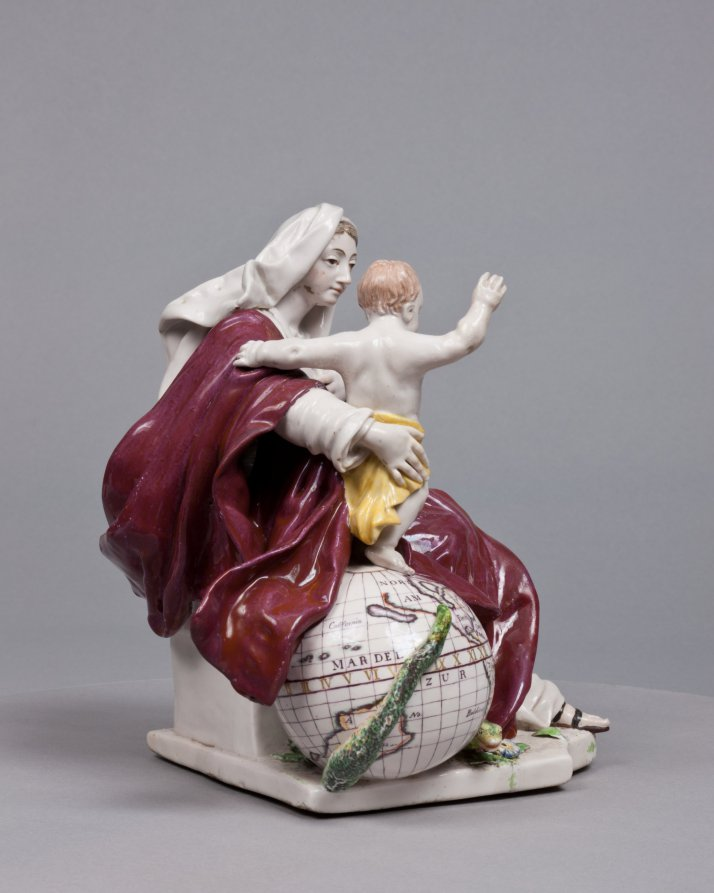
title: Madonna and Child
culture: England, Chelsea, 18th century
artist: Chelsea Porcelain Factory (Britain, London, 1745–84)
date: c. 1755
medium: porcelain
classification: Ceramic